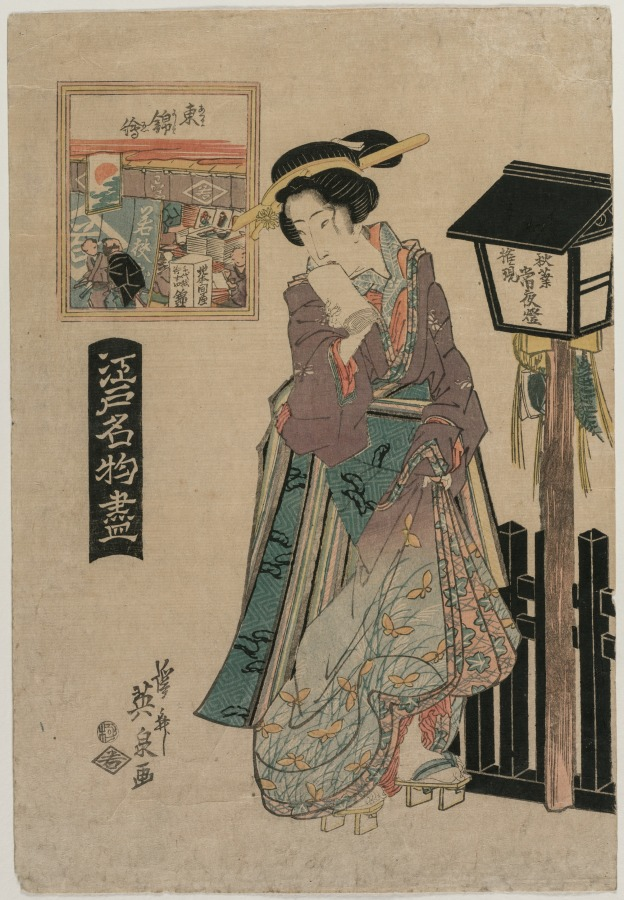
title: Pictures of Eastern Brocade (from the series Famous Products of Edo)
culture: Japan, Edo period (1615–1868)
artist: Keisai Eisen (Japanese, 1790–1848)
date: c. early 1820s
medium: color woodblock print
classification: Print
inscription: Signature: Keisai Eisen ga Seal: kiwame